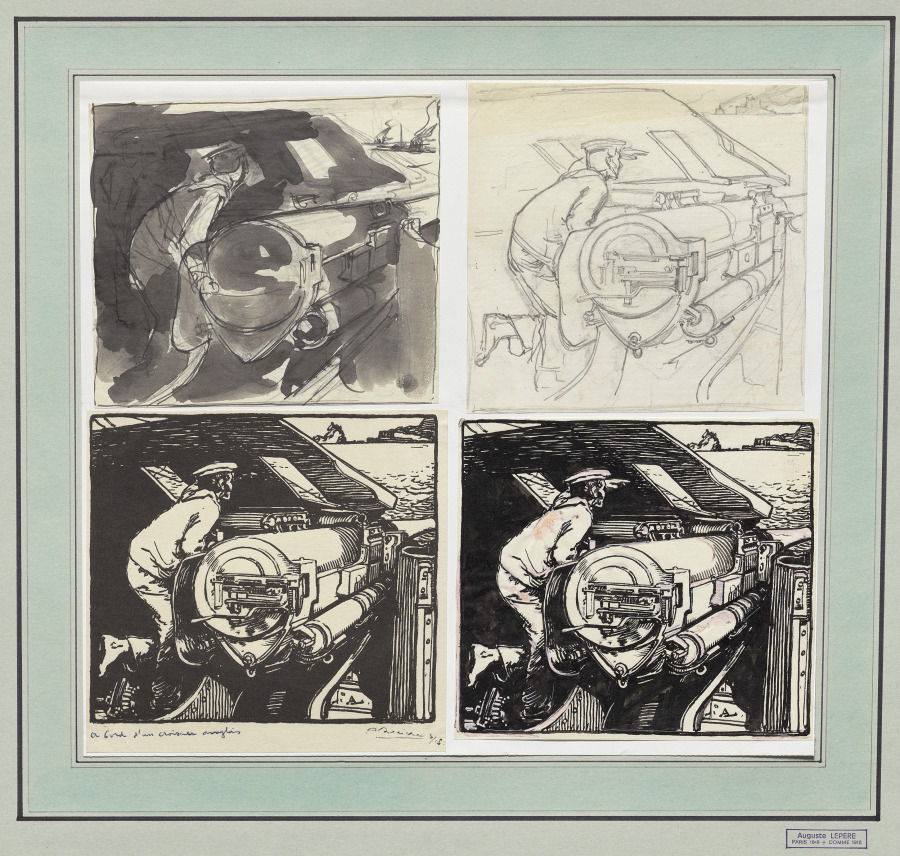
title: À bord d'un cruiseur anglais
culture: France, 20th century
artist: Auguste Louis Lepère (French, 1849–1918)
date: 1914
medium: pencil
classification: Drawing